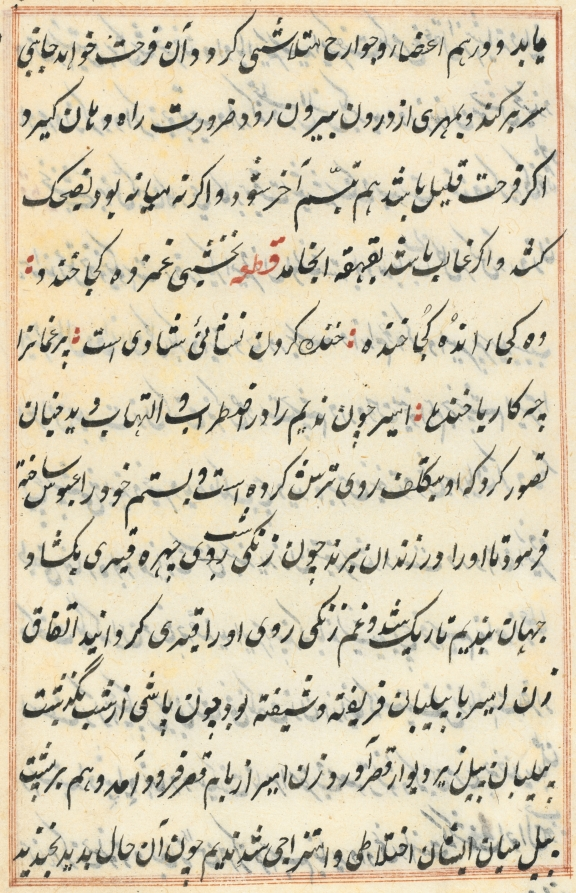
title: Page from Tales of a Parrot (Tuti-nama): text page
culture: Mughal India, court of Akbar (reigned 1556–1605)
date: c. 1560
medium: gum tempera, ink, and gold on paper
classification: Painting